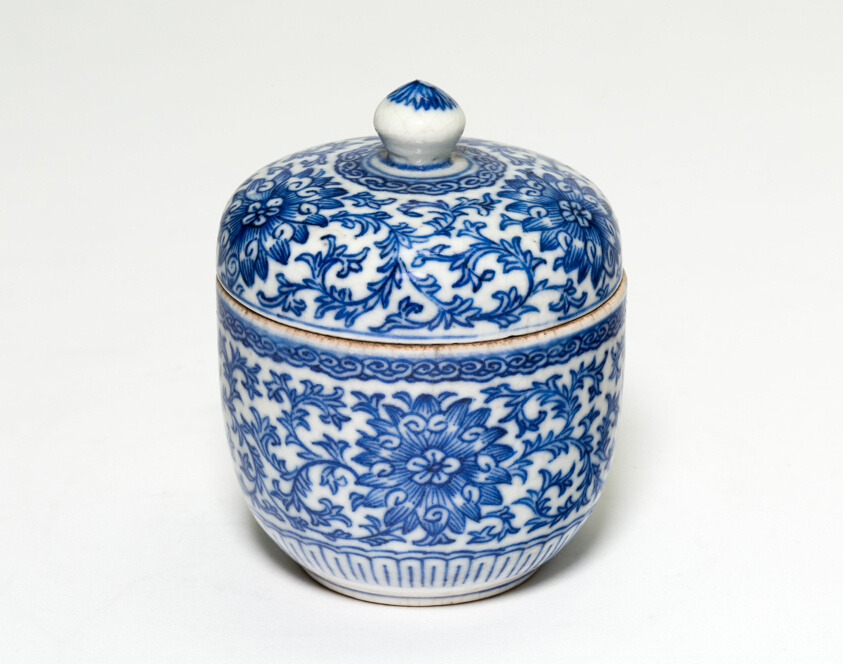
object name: Vessel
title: Miniature Covered Jar with Stylized Chrysanthemums and Vines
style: Chinese (culture or style)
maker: China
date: Qing dynasty (1644–1911)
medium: Porcelain painted in underglaze blue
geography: China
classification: porcelain; ceramics; asian art; vessel